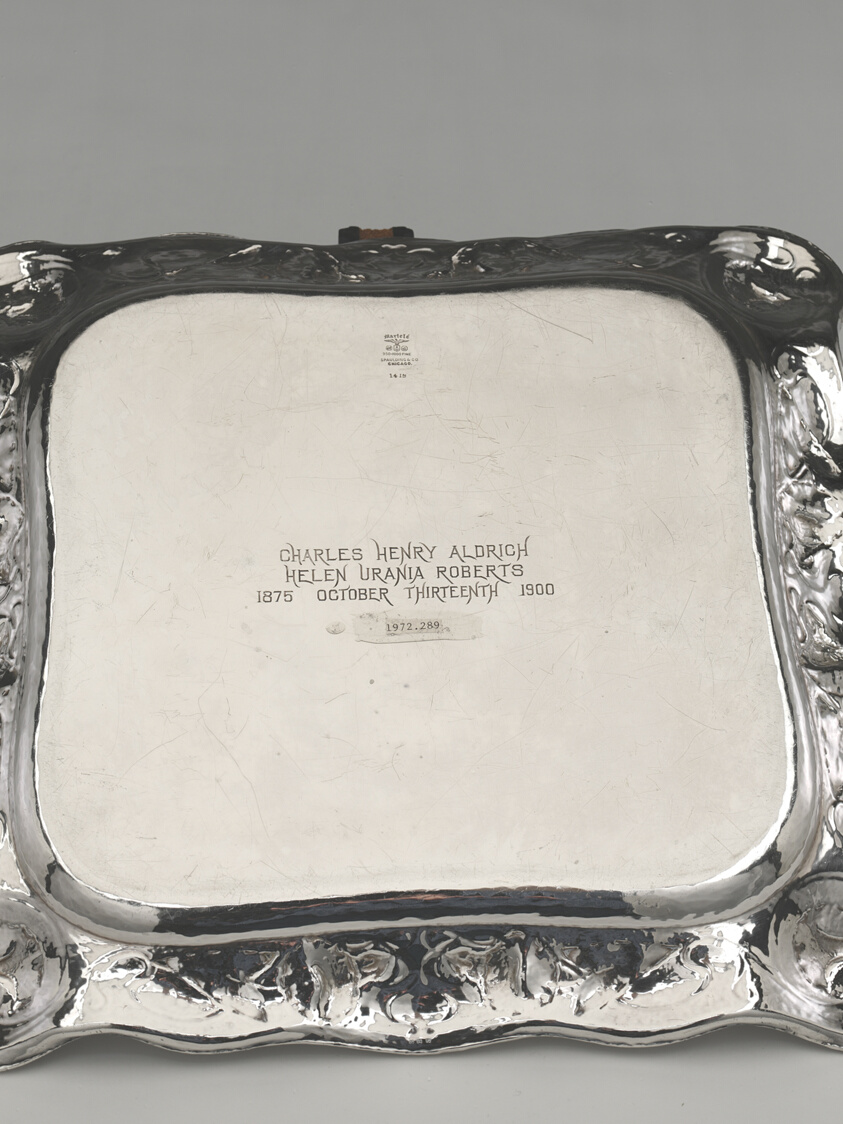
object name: Metalwork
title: Coffee Service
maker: Gorham Manufacturing Company (American, founded 1831); Providence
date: c. 1900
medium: Silver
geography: Providence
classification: coffee service; silver; american decorative arts; american arts; decorative arts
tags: dining, drinking